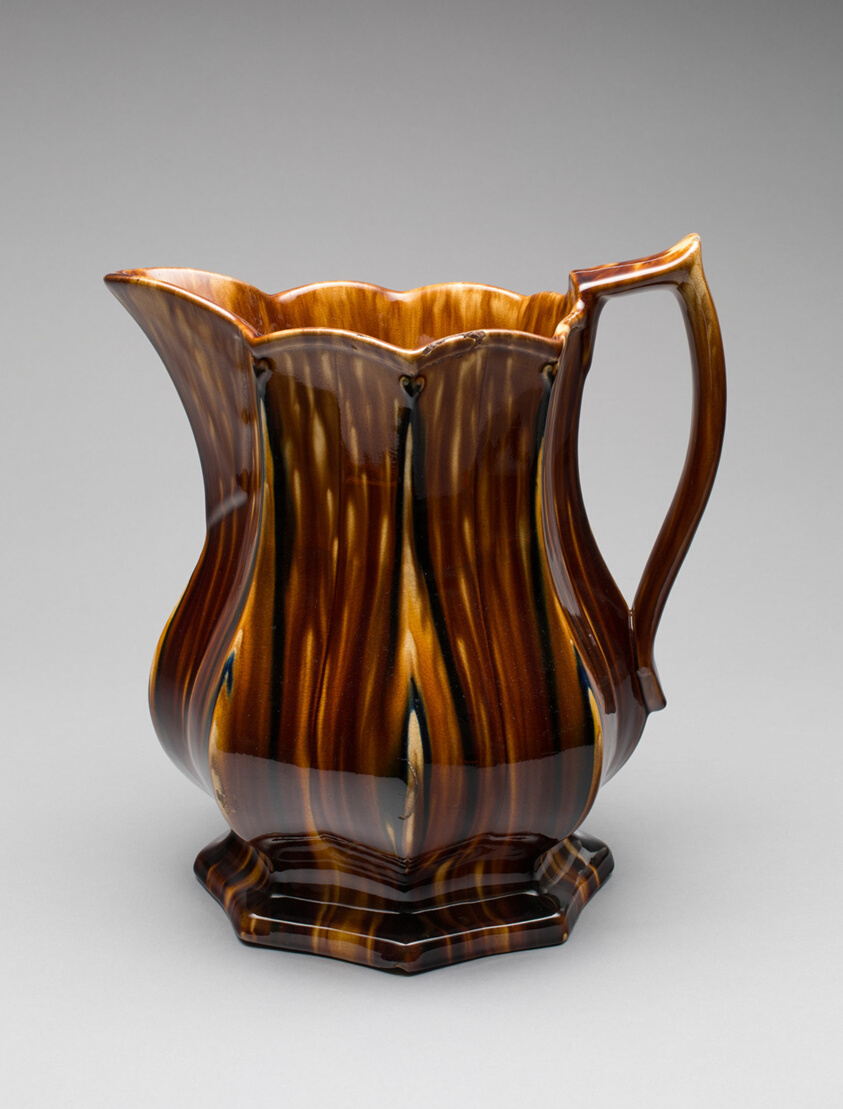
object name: Decorative Arts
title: Pitcher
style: Folk Art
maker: Lyman, Fenton & Company; American, 1849–52; Bennington, Vermont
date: 1849–52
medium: Earthenware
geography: Bennington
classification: pitcher (vessel); vessel; american decorative arts; american arts; ceramics; decorative arts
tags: dining, drinking